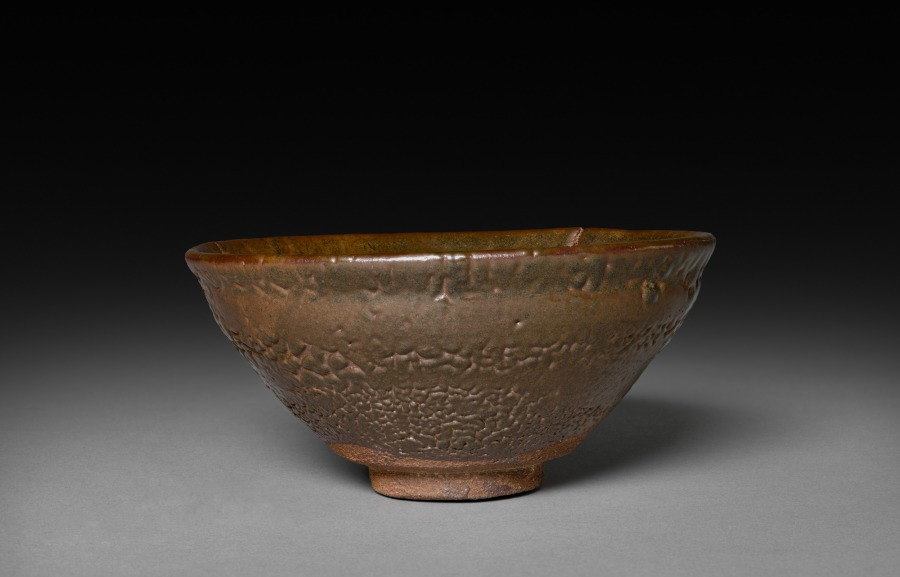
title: Tea Bowl: Jian ware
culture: China, near Shui ch'i, Song dynasty (960-1279)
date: 960–1279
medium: stoneware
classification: Ceramic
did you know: Jian ware was very popular with the tea cultures in China and Japan.